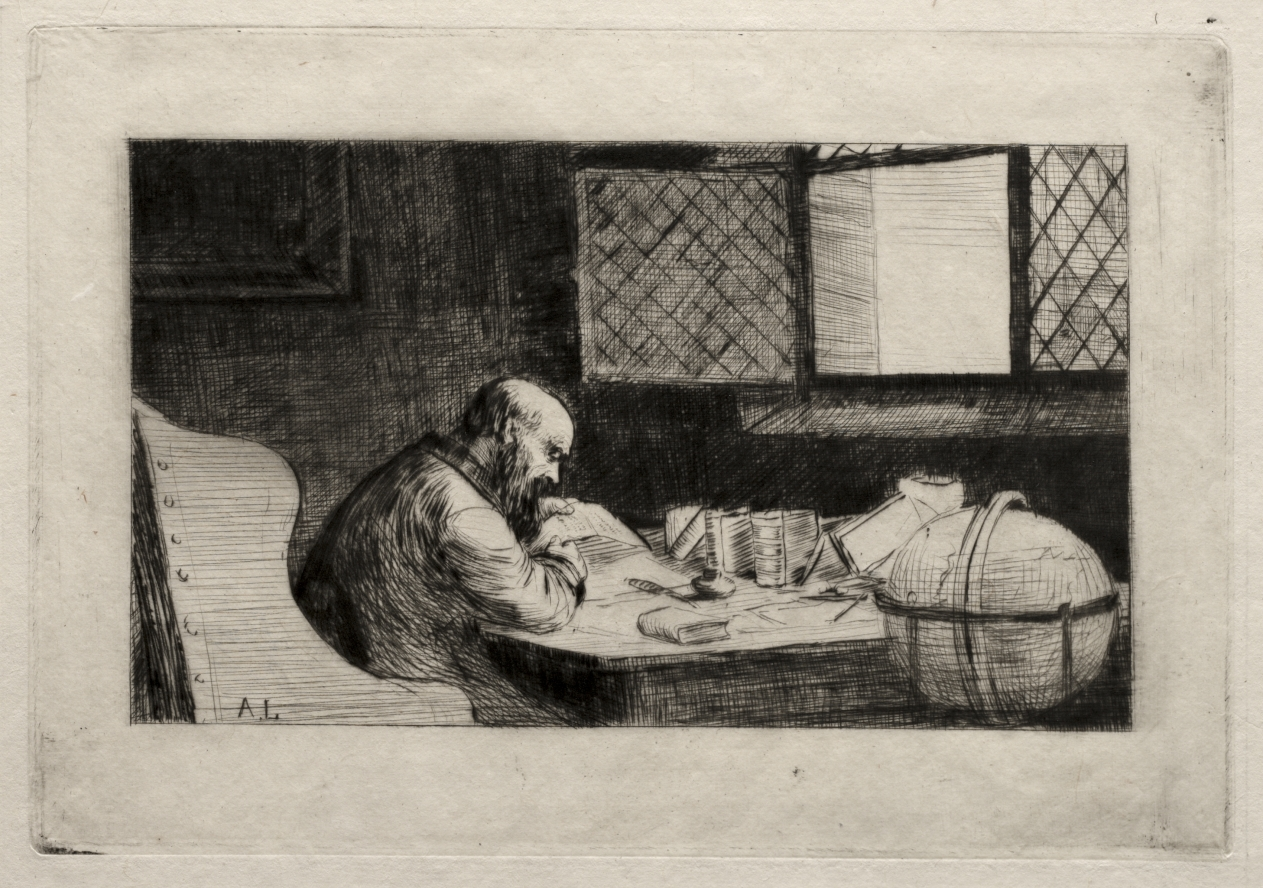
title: The Philosopher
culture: France, 19th century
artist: Alphonse Legros (French, 1837–1911)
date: c. 1857–1911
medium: etching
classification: Print